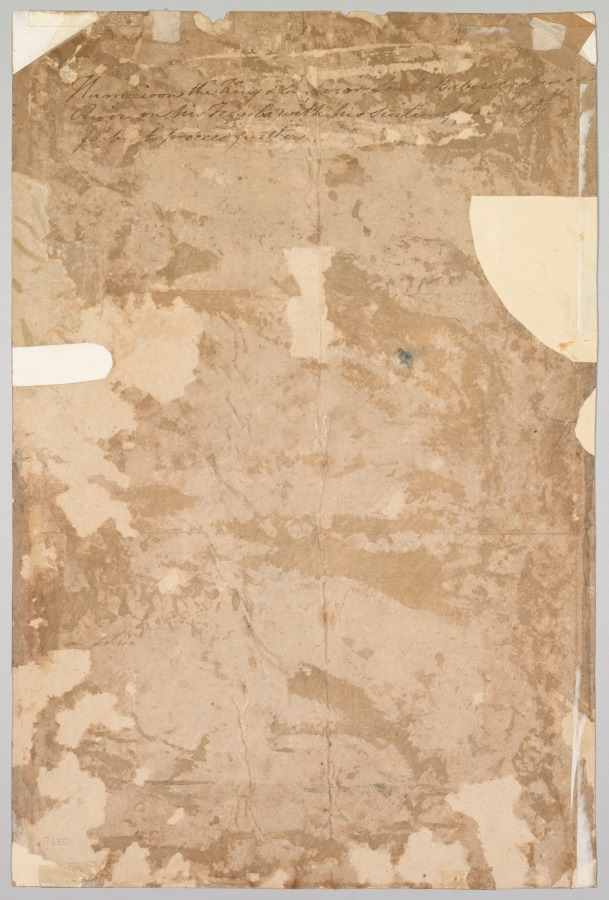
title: Babur meeting with Sultan Ali Mirza at the Kohik River, from a Babur-nama (Memoirs of Babur)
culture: India, Mughal school, 16th century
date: c. 1590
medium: Gum tempera and gold on paper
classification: Painting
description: Thirty years before he captured Delhi and founded the Mughal Empire, Babur began his expansionist activities at the age of 13, as depicted in this painting of an encounter that took place in 1496. Having traveled long distances across harsh dry terrain, Babur confronted one of his rivals who, like him, was angling to march on and conquer the illustrious city of Samarkand, the former capital of his ancestor Timur.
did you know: Camels carry collapsed tents to be pitched for nightly encampments and parties.